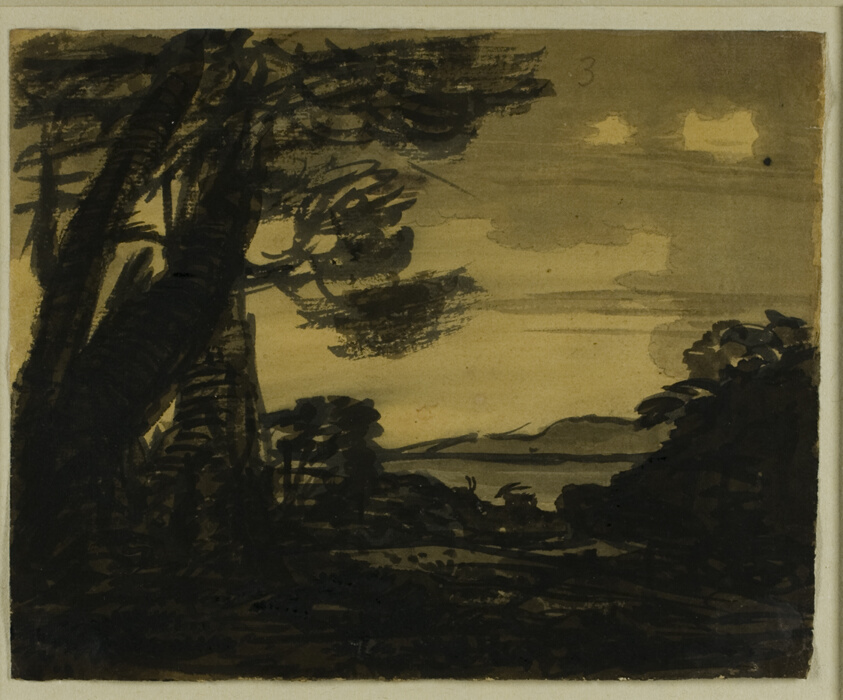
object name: Drawing and Watercolor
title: Goats on the Edge of a Lake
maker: Alexander Cozens (English, 1717-1786)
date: 1760s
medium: Watercolor, over traces of graphite, on ivory laid paper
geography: England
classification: paper; watercolor; prints and drawing